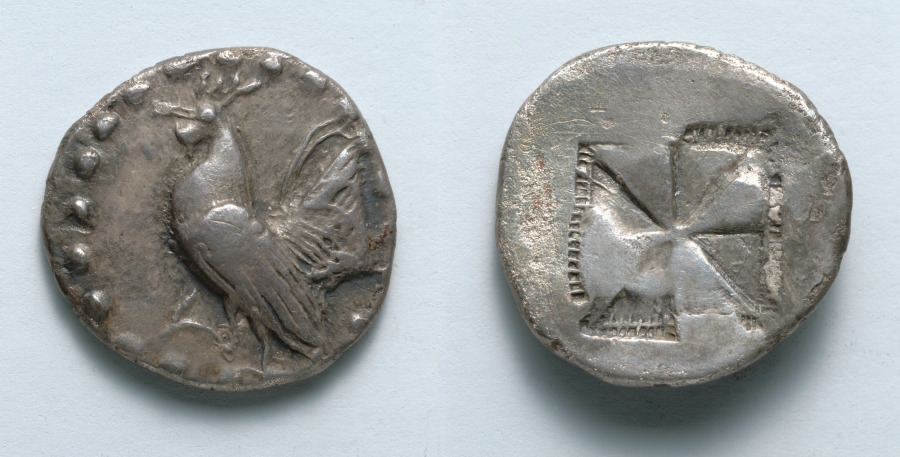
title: Drachm: Rooster (obverse); Incuse Square (reverse)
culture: Greek, minted at Himera (Sicily)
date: c. 530–483 BCE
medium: silver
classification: Coins